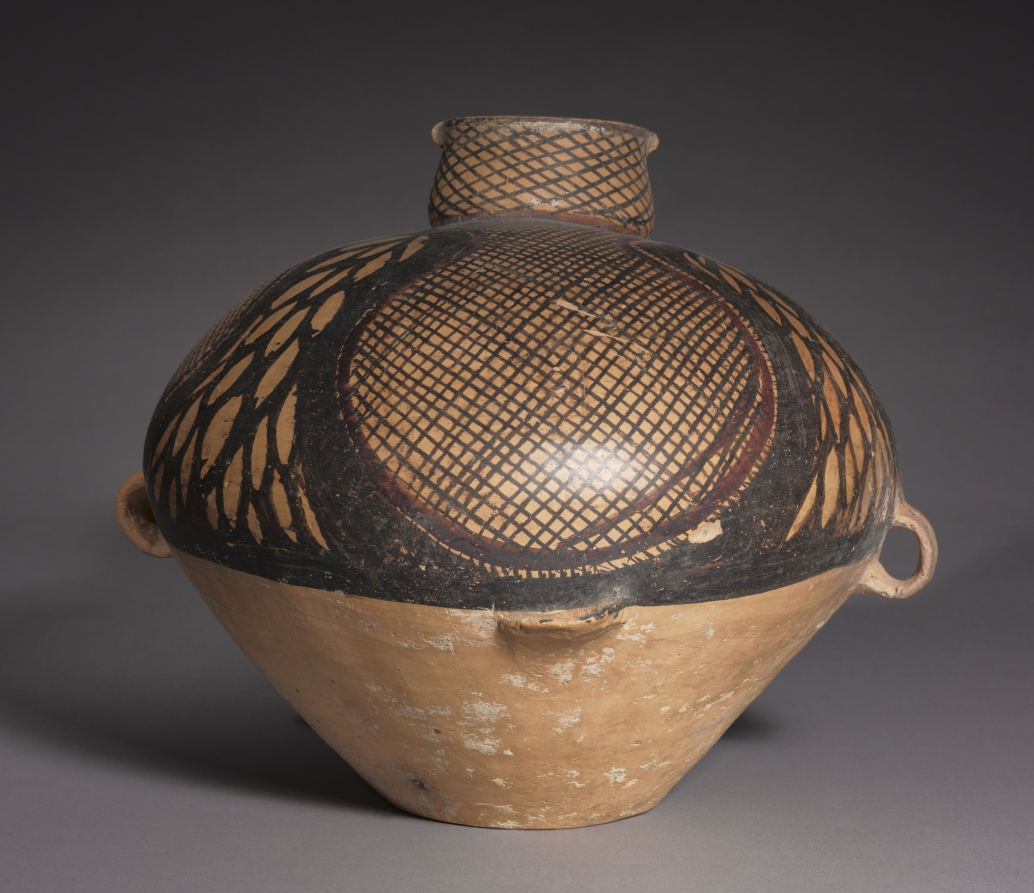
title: Bird-shaped Urn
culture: Northwest China, Neolithic period, Majiayao culture, Banshan phase (2650–2350 BCE)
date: 2650–2350 BCE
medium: earthenware with slip-painted decoration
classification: Ceramic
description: An imaginative shape and abstract curvilinear patterns lend delightful charm to this functional jar. Its fine-grained body has a light reddish color due to the iron content in the clay, achieved by ensuring abundant air in the kiln during the firing. The surfaces were burnished before applying the painted decoration in black and red.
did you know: This abstract vessel may be imagined as a bird with feathers painted on the body.